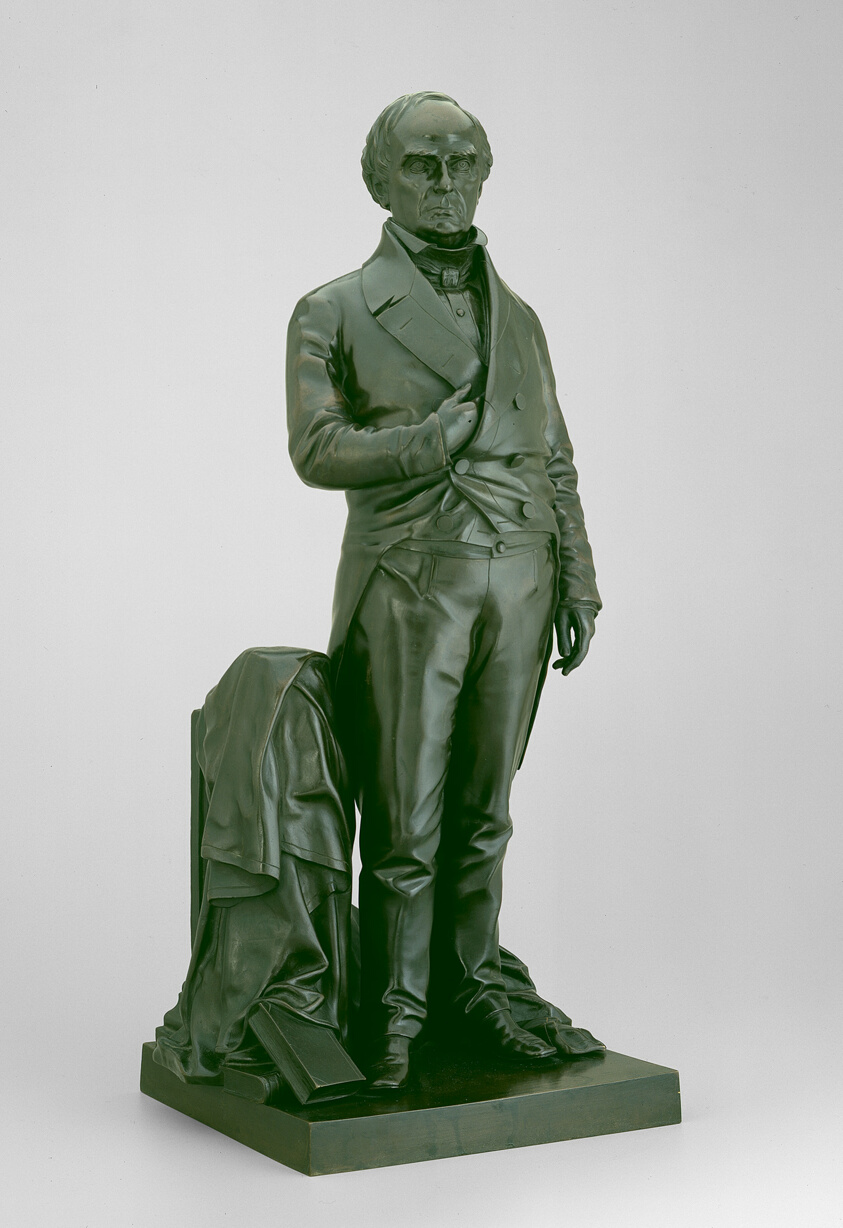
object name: Sculpture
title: Daniel Webster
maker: Thomas Ball (American, 1819–1911); Cast by James Tyler Ames (American, 1810–1883); Chicopee, Massachusetts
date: Modeled and cast 1853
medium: Bronze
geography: Chicopee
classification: sculpture; american arts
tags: people, portraits